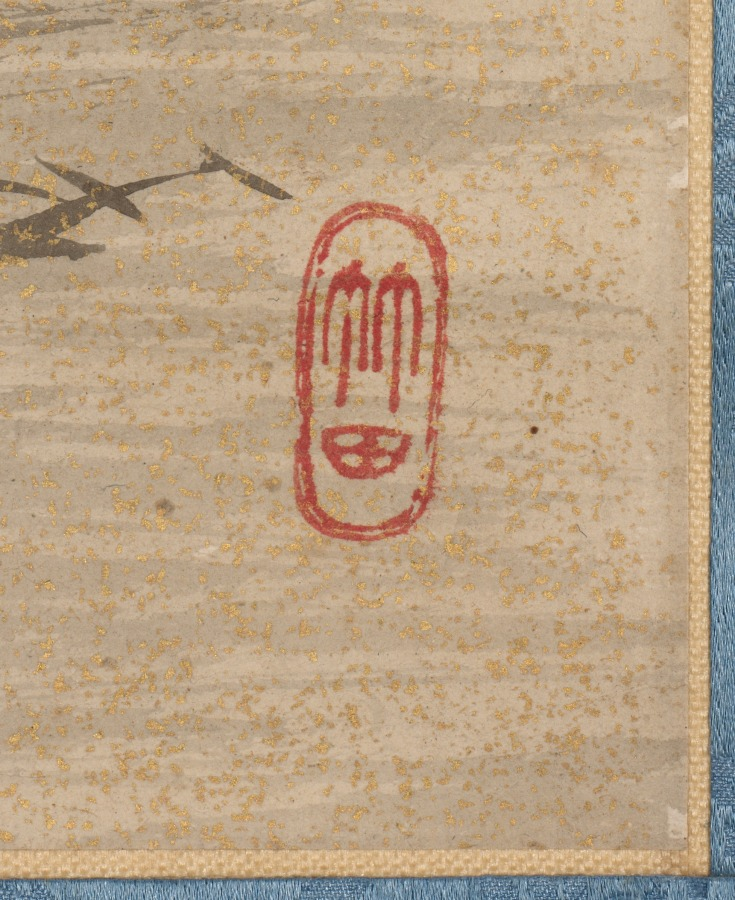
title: Mountain View and Blue Water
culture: Japan, Edo period (1615–1868)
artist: Tanomura Chikuden (Japanese, 1777–1835)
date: early 1800s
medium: hanging scroll; ink, color, and gold on paper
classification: Painting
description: Tanomura Chikuden was an eminent painter whose adopted son, Tanomura Chokunyū (1814–1907), was Seifū Yohei III’s painting teacher. This work was displayed at a gathering commemorating the 10th anniversary of Chokunyū’s death, something we know only because its custom-made box and archival documents have been carefully kept together. The box inscription also confirms that Chikuden was emulating the style of the Mi family of painters, active during China’s Southern Song dynasty (1127–1279). The painting’s Chinese-style silk wrapper is inscribed and sealed on its interior by members of Chokunyū’s community.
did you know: The mountain shapes are built up with multiple small wet strokes.